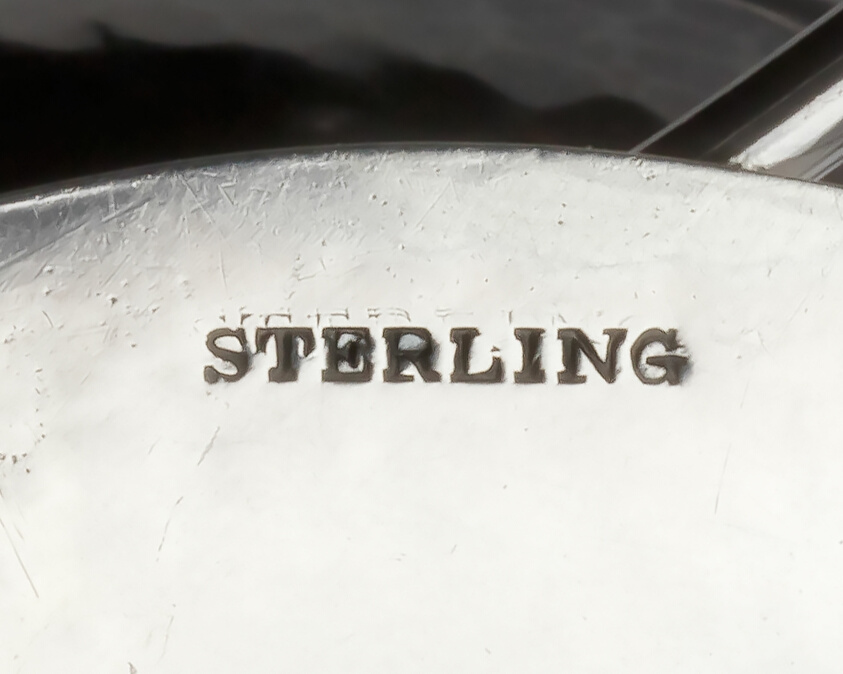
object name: Metalwork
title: Two-Handled Dish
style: Arts and Crafts Movement, American Arts and Crafts Movement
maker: Shreve, Crump and Low (American, founded 1869); Boston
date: 1902–7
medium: Silver and turquoise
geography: Boston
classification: dish (vessel); silver; american decorative arts; american arts; decorative arts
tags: dining, drinking